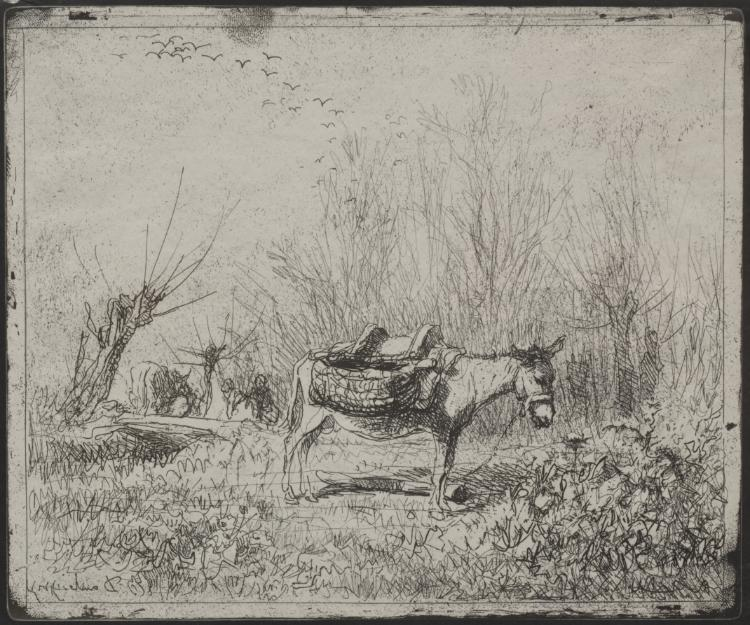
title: A Donkey in the Field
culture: France, 19th century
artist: Charles François Daubigny (French, 1817–1878)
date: original impression 1862, printed in 1921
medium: cliché-verre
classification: Print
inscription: signed, lower left, in glass plate: Daubigny (in reverse)